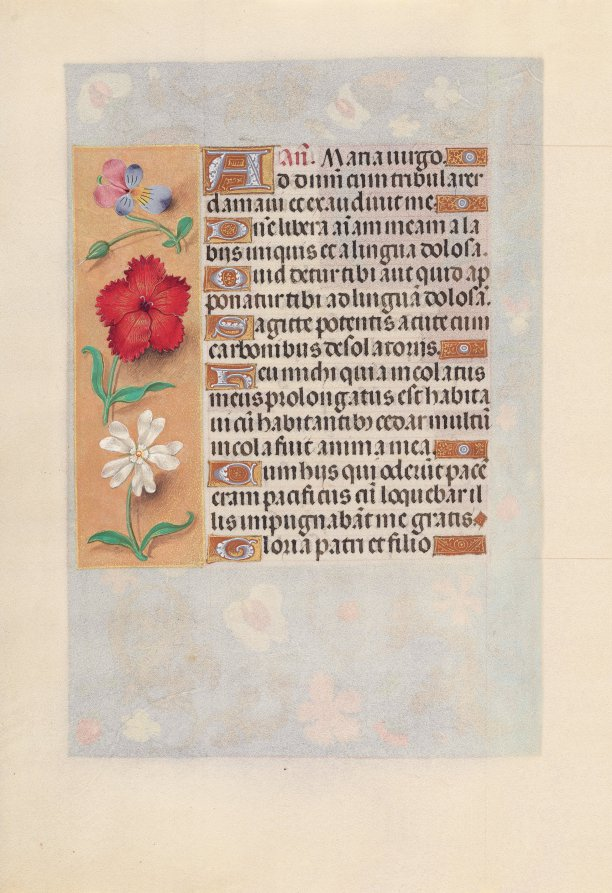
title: Hours of Queen Isabella the Catholic, Queen of Spain: Fol. 132v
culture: Flanders, Ghent and Bruges, late 15th century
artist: Master of the First Prayerbook of Maximillian (Flemish, c. 1444–1519)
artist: and Associates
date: c. 1500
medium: ink, tempera, and gold on vellum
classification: Bound Volume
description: This manuscript was illuminated by a circle of at least five highly organized manuscript painters active in the Flemish cities of Ghent and Bruges. The principal illuminator was Alexander Bening, who painted the majority of the book's miniatures. Manuscripts produced by this circle of artists are renowned for the decoration of their borders, which typically feature a rich variety of realistically-painted flowers, birds, and butterflies. This prayer book, called a book of hours, was intended not for a cleric, but for the private devotions of a lay person-in this case, Isabella the Catholic, Queen of Spain (1451-1504). Isabella's coat of arms embellishes the book's frontispiece. It is unlikely that the book was commissioned by the Queen herself; rather, she probably received it as a diplomatic gift from someone courting her patronage, perhaps Cardinal Francisco Jimenez de Cisneros. A Franciscan friar, Jimenez was dependent upon Isabella for his advancement, first to the post of Queen's confessor in 1492, and then to Archbishop of Toledo in 1495.